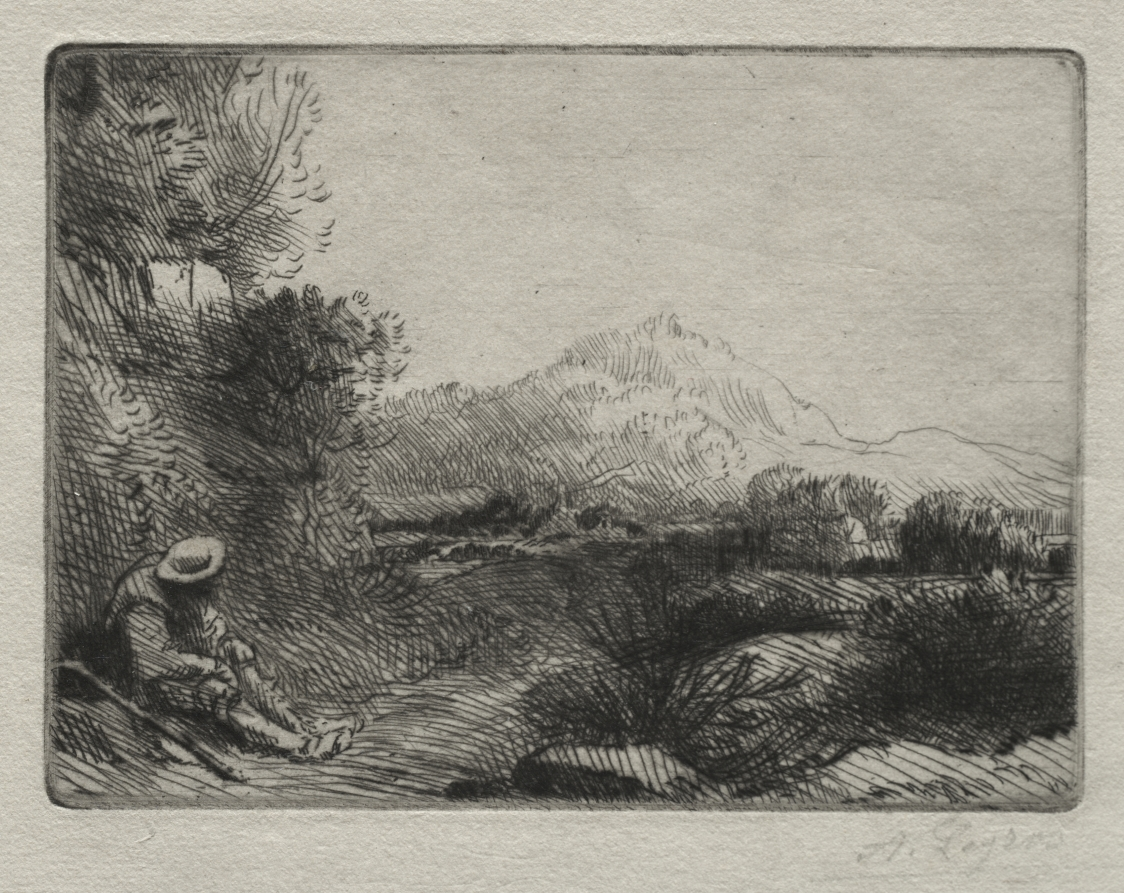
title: Rest of the Traveler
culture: France, 19th century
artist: Alphonse Legros (French, 1837–1911)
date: c. 1857–1911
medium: drypoint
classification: Print